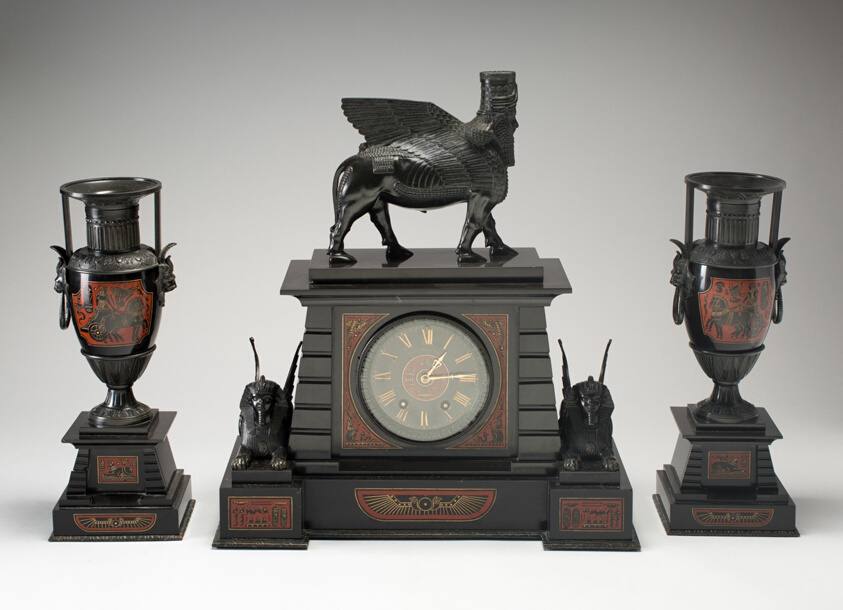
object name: Metalwork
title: Egyptian Revival Clock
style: egyptian revival, european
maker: Brocot; Paris, France, 19th century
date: 1875/90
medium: Black marble with red, gold, and black inlaid decorations, antiqued bronze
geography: Paris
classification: clock; furniture; european decorative arts; metalwork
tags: furniture